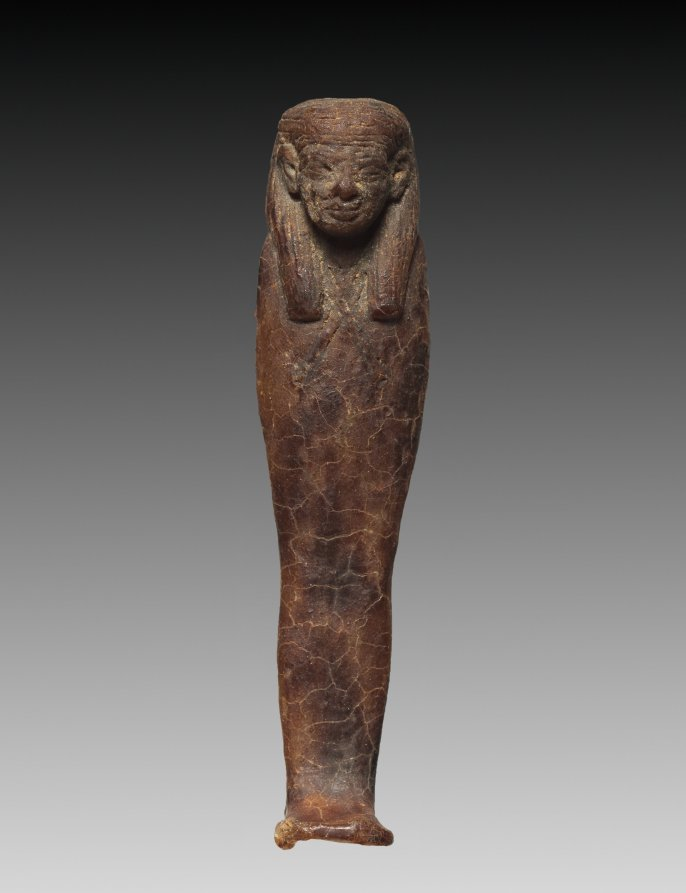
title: Son of Horus: Imsety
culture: Egypt, Third Intermediate (1069–715 BCE), Dynasties 21–22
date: 1000–900 BCE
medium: wax with dark amber varnish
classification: Funerary Equipment